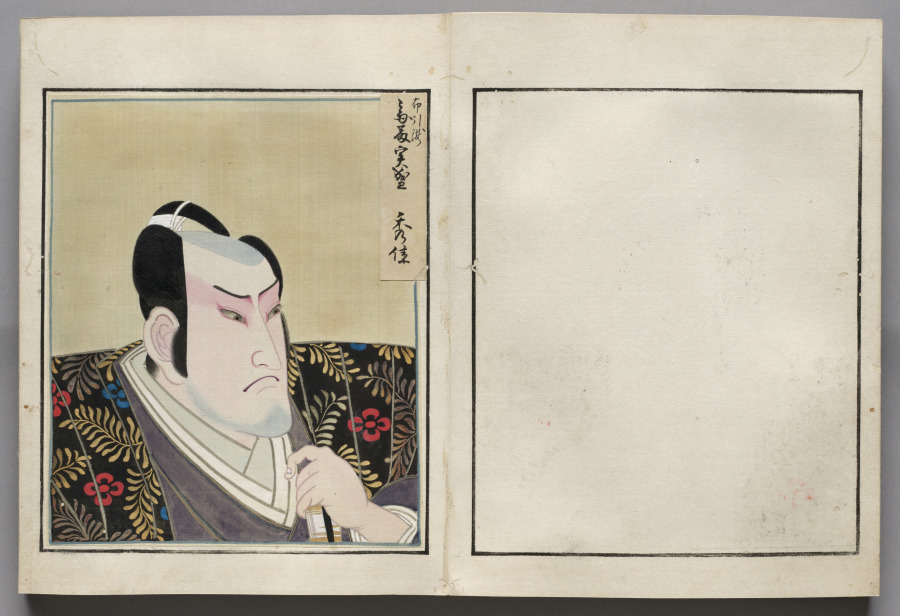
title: Double-Leaf from Album of Actor Portraits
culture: Japan, Edo period (1615–1868)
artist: Shōrakusai (Japanese)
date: c. 1790–1810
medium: double-leaf from an accordion-style album; ink and color on silk (left)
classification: Bound Volume